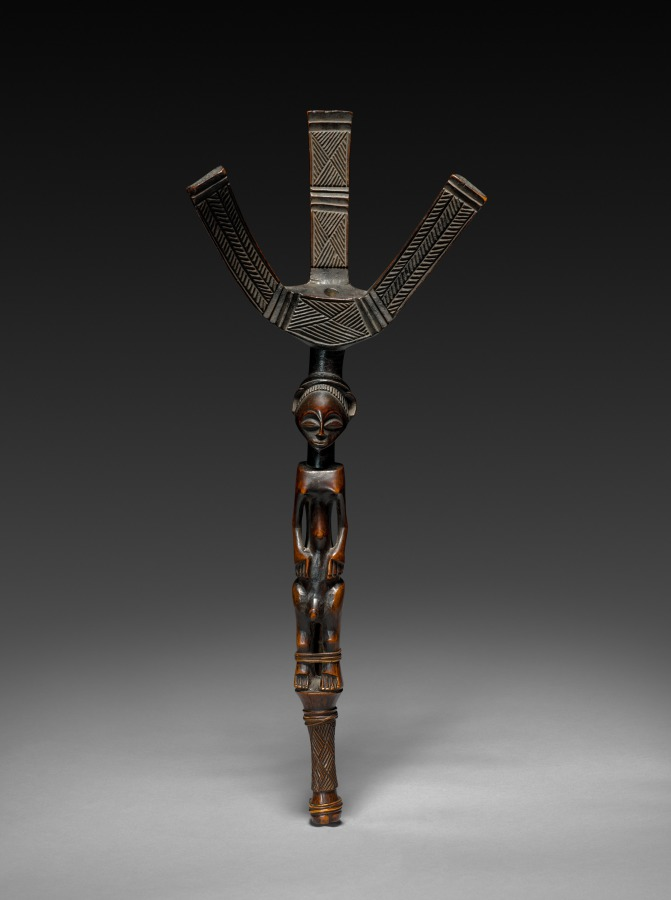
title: Bow Stand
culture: Africa, Central Africa, Democratic Republic of Congo, Luba-style carver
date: 1800s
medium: Wood and plant fiber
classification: Sculpture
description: A powerful symbol of the Luba king, bow stands were ceremonial objects that resided within the king’s private vicinity in the palace and were never displayed in public. Typically, bow stands depict a female figure, but the sculptor has carved a figure with ambiguously gendered human traits. This is a symbolic depiction that may allude to how divine rulers (mulopwe) were believed to have both “male” and “female” character traits, which allowed this sculpture to act as a vessel for spirits of any gender.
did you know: The shape of this wooden bow stand is based on a more practical version in metal used by hunters.